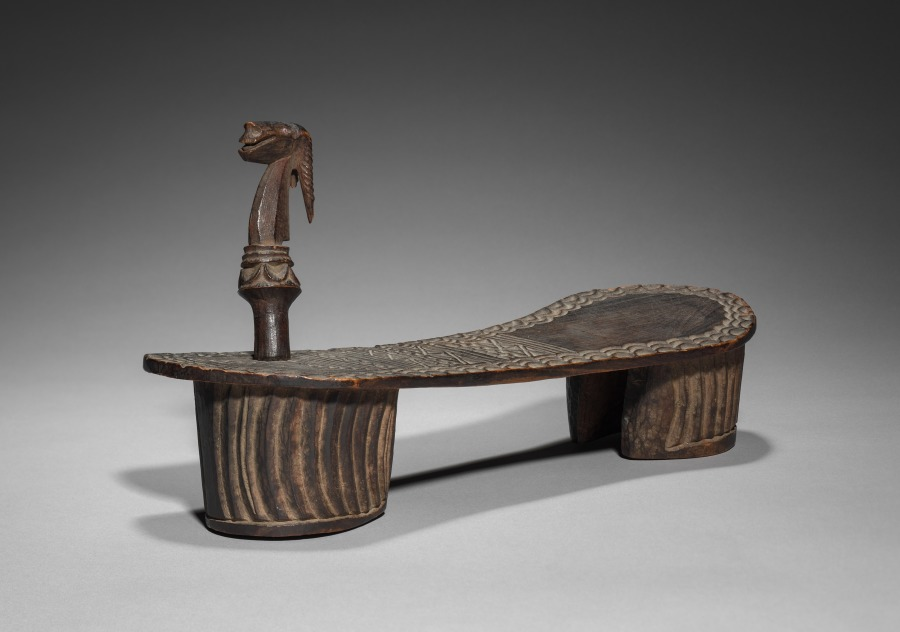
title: Sandal (mtalawanda / mtawanda) or Clog (kiatu cha mti)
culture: Africa, Central Africa, Democratic Republic of Congo, unidentified carver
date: c 1800s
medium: Wood and glass beads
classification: Wood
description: Common in the Indian Ocean region, wooden sandals changed meaning across place and time. This pair’s base elevates the foot as the toes grip an antelope-shaped peg (msuruaki). Crisp geometric sole designs suggest they were rarely worn. East African elites and merchants once had exclusive rights to wooden shoes, wearing elaborate ones only for portraits. Formerly enslaved people living along the coast wore simpler ones from the 1840s onward, adopting elite footwear to assert their liberation. However, slave traders like the Zanzibari “Tippu Tip” (c. 1832–1905) likely brought mitalawanda to Central Africa; stylistic elements of this pair hail from that region.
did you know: This distinctive footwear traveled from Southeast Asia and the Middle East to Africa, first to the Swahili Coast and then further inland to parts of Central Africa. The deity Krishna wears similar shoes (paduka) in an eighteenth-century Indian miniature painting (2003.344).